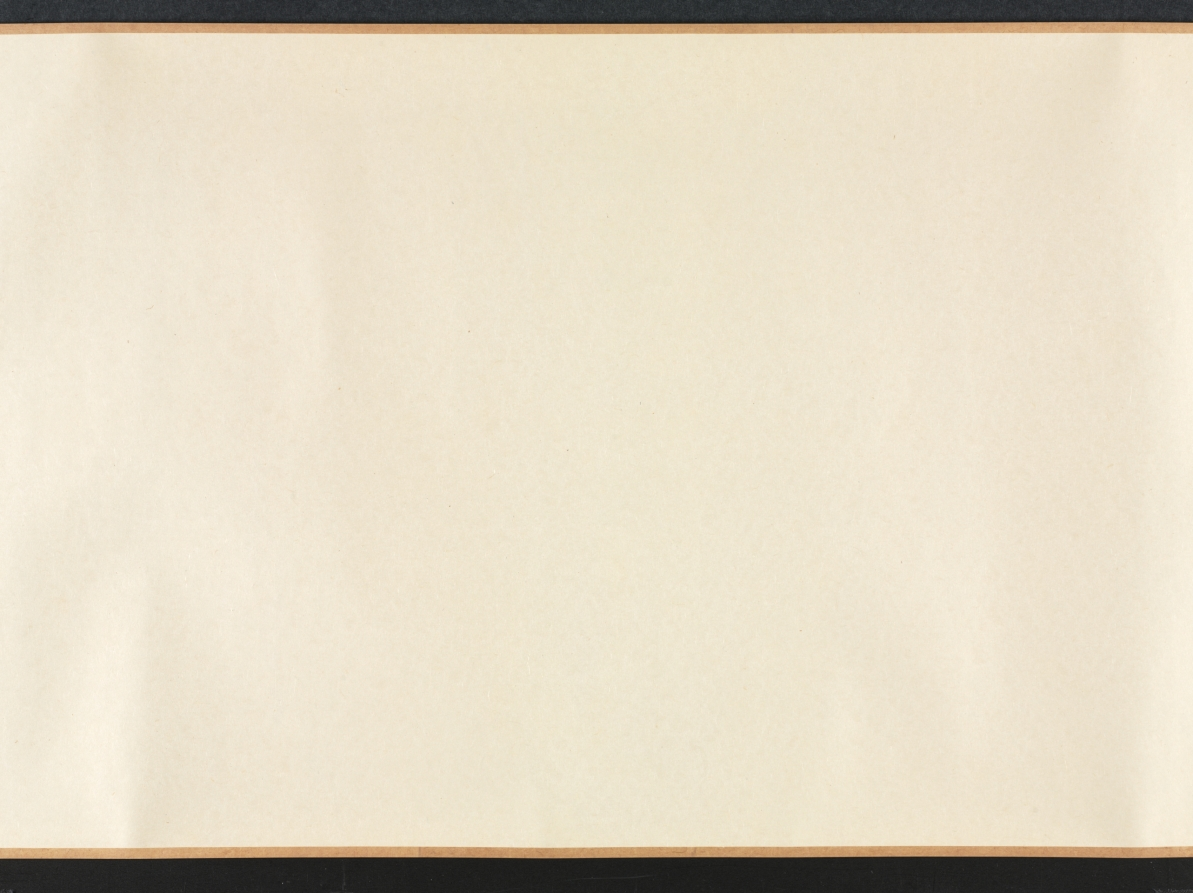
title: Hall of Lofty Pines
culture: China, Qing dynasty (1644-1911)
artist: Wang Hui (Chinese, 1632–1717)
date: 1703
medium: handscroll; ink and color on paper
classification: Painting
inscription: [題] 松喬堂圖 康熙癸未夏六月, 海虞耕煙散人王翬畫。[印]王翬之印; 石谷. [左下] 來青閣; 耕煙野老時年七十有二.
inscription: 松喬堂圖一卷，海虞石谷王君為靜海近公厲少司冦公作也。圖成于癸未之夏。未幾而公遂仙去。公令子今編修君南湖屬余題跋其後。余與公同官侍從，交契最深。側見公之清修純德，蔚為聖天子所眷重。侍直內廷，密勿贊襄，幾二十餘年。蒼生之所以受賜，士林之所以沐德者，天下莫能窺，在廷莫能悉。而公卒不言。以故宸衷日益契，恩禮亦日益渥。雖年逾懸車，時有歸老之念。而上固不聼公之去。其所謂松喬堂者，御書以賜公者也。蓋以松比公之清風勁節，而歲寒不改，經霜彌茂。則又以期公之壽考未有艾焉。公知此身未易乞，而山林槃磵之樂，止可寄諸寤思。此松喬堂圖之所由作也歟。石谷此圖，結構精密，筆墨超邁。其寫樹木之蒼蔚，堂宇之靚幽。恍見摩詰輞川樂天廬山之勝。獨惜公未得一日徜徉故園以償其願。即繪於圖亦未得以永其趣，此編修君之所以眷眷不忘也。雖然千歳之松喬，下蔭百畝，上以修棟梁之需。然則上當日名堂之意，不更望於後之人襲其芘而養其材也哉。吾願編修君之寶斯圖。并望君之塗塈丹雘，大其堂構也已矣。 康熈丙戍重陽三日，雲間王鴻緒跋。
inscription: 10 additional seals: 1 seal of Li Duna 勵杜納 (1628–1703); 4 seals of Zha Ying 查瑩 (jinshi of 1766); 5 seals of Li Yun (dates unknown).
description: Wang Hui 王翬, a leading painter in the orthodox school of the early Qing dynasty (1644–1911), was commissioned to paint this landscape with a country estate for Li Duna 勵杜納 (1628–1703), vice minister of justice in Emperor Kangxi’s court. The emperor had honored Li by granting him a piece of calligraphy with the name of Li’s retirement retreat, “Hall of Lofty Pines.” He drew a comparison between pines and Li’s upright character, resilience, and longevity. Wang Hui’s painting was supposed to allow Li to imagine living in a beautiful, secluded compound among the hills and pines. Sadly, Li died before seeing the completed painting and before receiving the emperor’s permission to retire. The landscape begins with peaceful riverbanks and low hills. The pines around the estate in the middle of the handscroll are truly lofty, some stretching even beyond the frame of the painting. Li Duna, the estate’s owner, is shown twice in his serene mountain retreat: first approaching the entrance to the compound with two servants at the right, and then later in the scroll, to the left, reading in the comfort of an inner room.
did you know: One servant carries the estate owner's carefully wrapped qin, a type of zither.